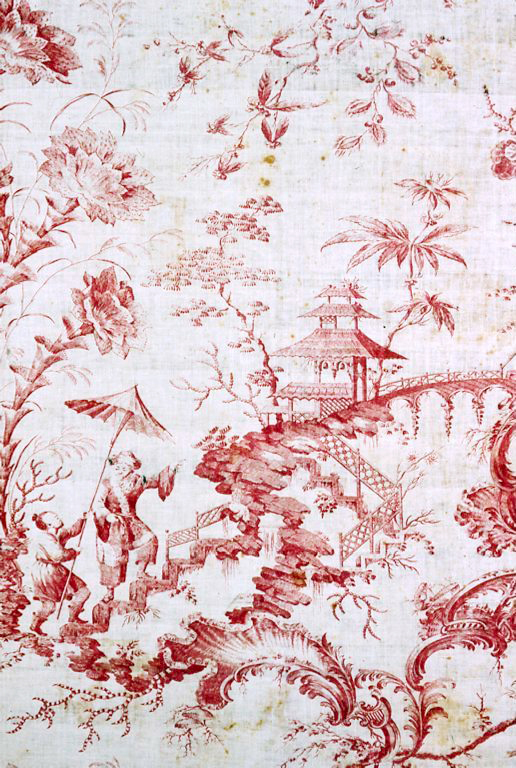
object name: Textile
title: Panel (Furnishing Fabric)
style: chinoiserie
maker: Designed by Jean Baptiste Pillement (French, 1728–1808); Manufactured by Bromley Hall (English, 1694–1823); Middlesex, England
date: 1760/70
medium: Cotton, plain weave; copperplate printed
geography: England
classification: textile; weaving - printed; furnishing textile